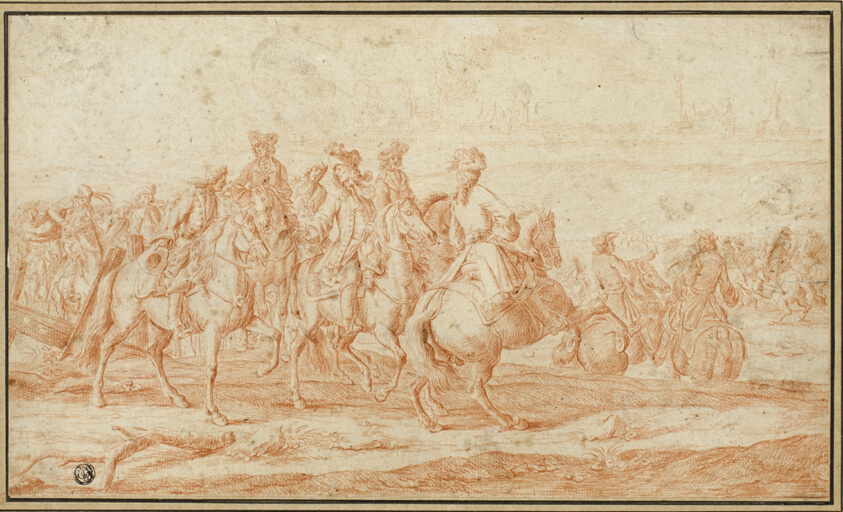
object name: Drawing and Watercolor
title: Review of Troops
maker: Georg Philipp Rugendas, I (German, 1666-1742); or Philips Wouwerman (Dutch, 1619-1668)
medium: Red chalk on gray laid paper, laid down on card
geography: Germany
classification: chalk; drawings (visual works); prints and drawing